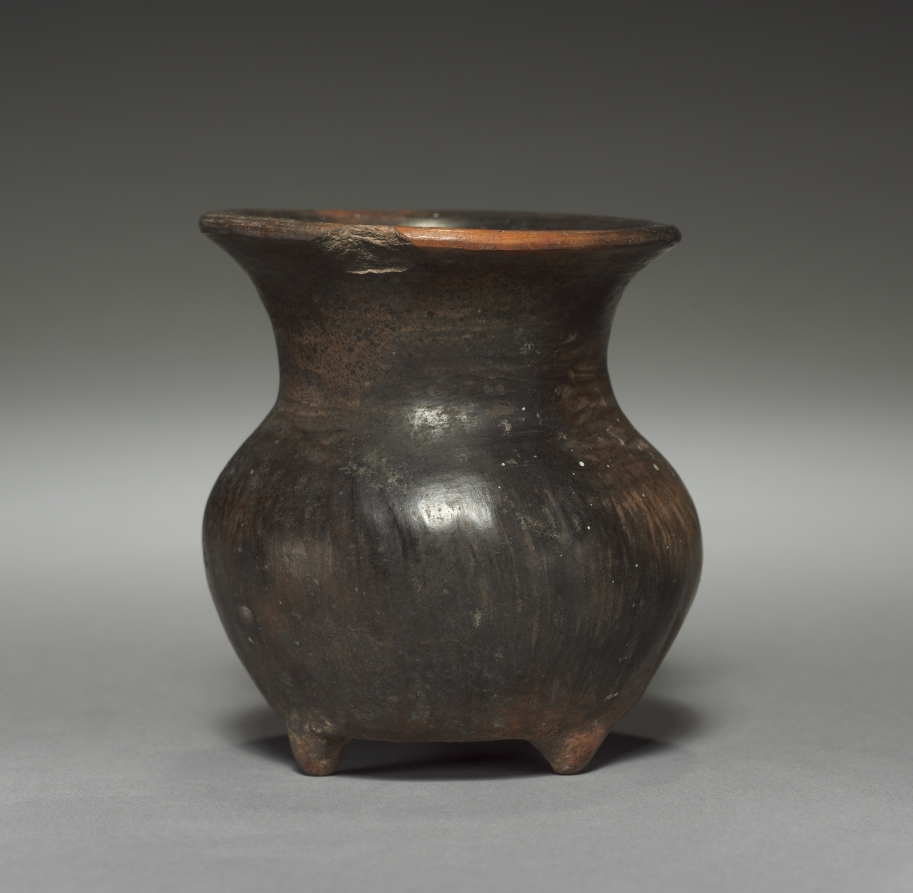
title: Vase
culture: Mexico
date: before 1521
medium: pottery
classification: Ceramic